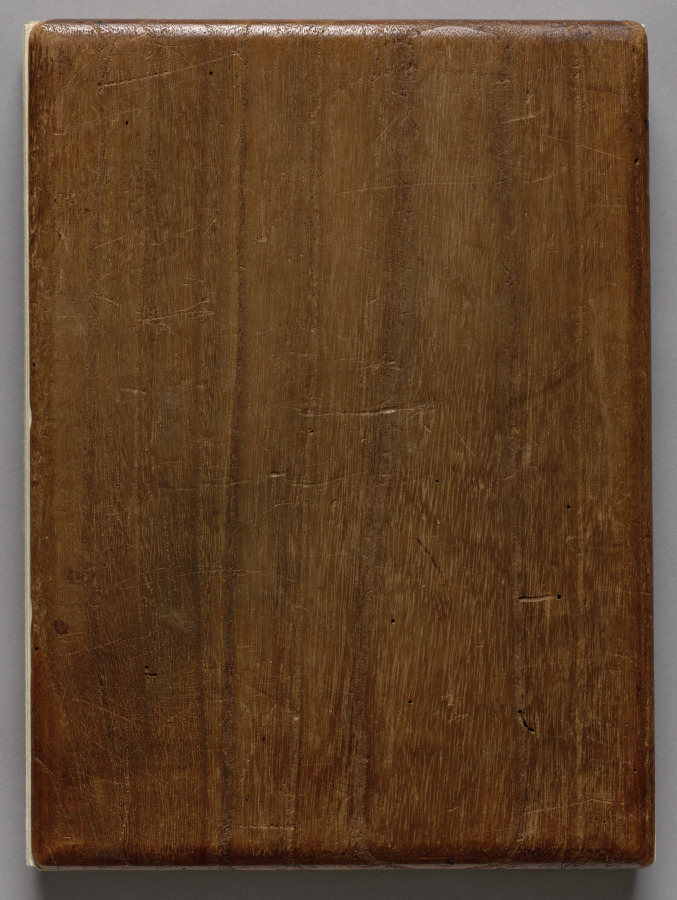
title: Album of Actor Portraits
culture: Japan, Edo period (1615–1868)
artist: Shōrakusai (Japanese)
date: c. 1790–1810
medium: accordion-style album; ink and color on silk mounted on paper and ink on paper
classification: Bound Volume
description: The paintings in this album show Kabuki actors costumed for their roles in a variety of plays. The characters are identified in the paper cartouches affixed to the paintings. While each painting is on silk that has been pasted into the album, the poems on some of the facing pages have been written in ink directly onto the page.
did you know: This album contains paintings of Kabuki actors who performed in the city of Osaka.